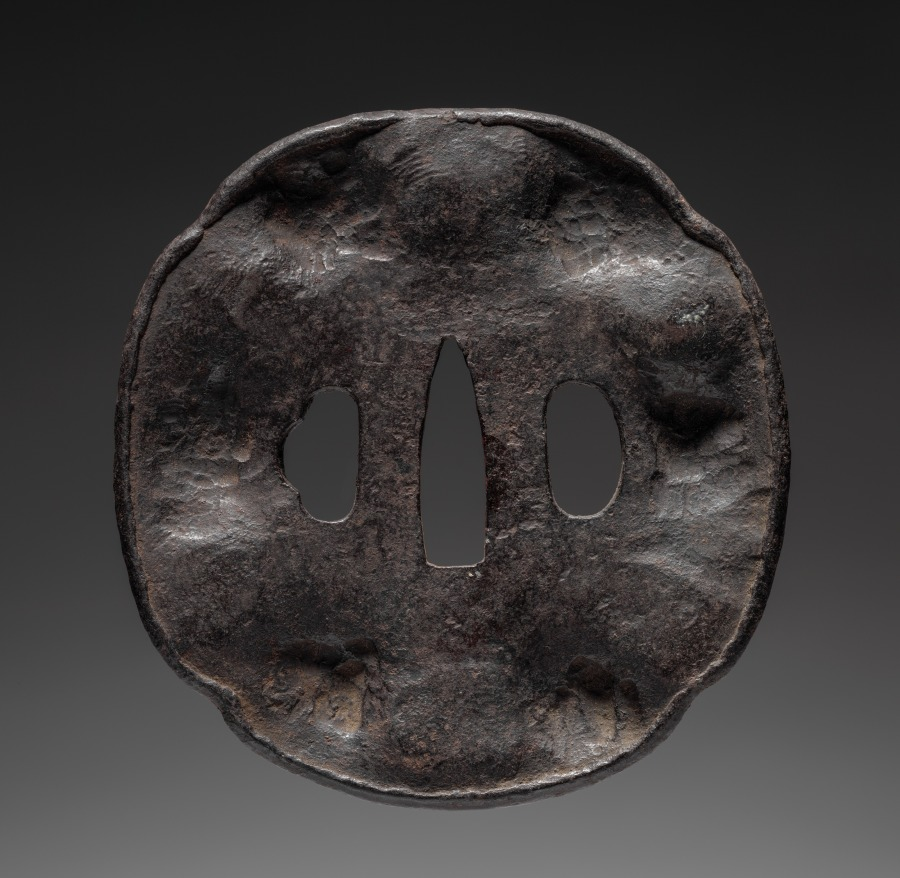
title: Sword Guard (Tsuba)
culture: Japan, possibly Edo period (1615-1868)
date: c. 1615–1868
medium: iron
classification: Arms and Armor